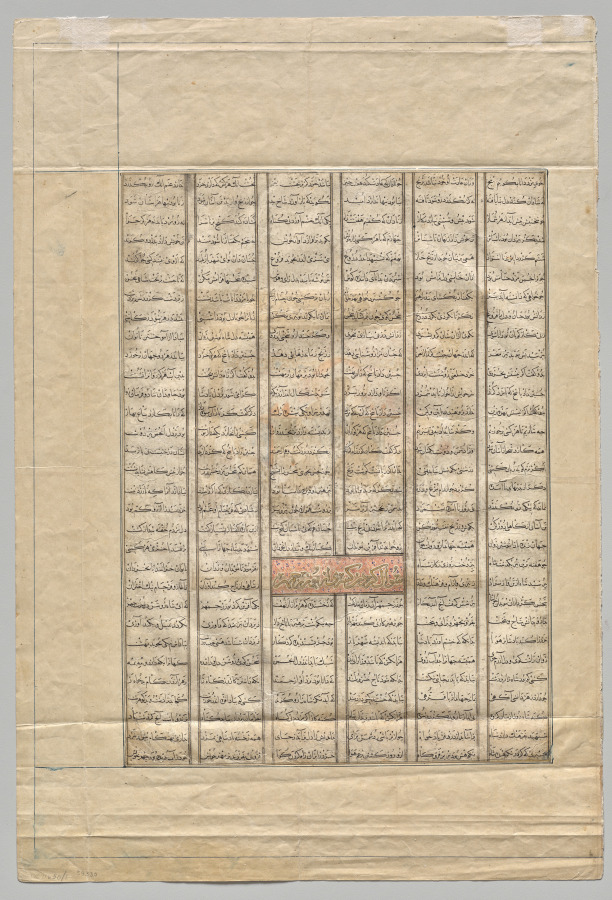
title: Persian Verses: The Fortieth Year of King Kisra Nushirwan's Reign and the Story of Buzurgmihr (recto) from a Shahnama (Book of Kings) of Firdausi (940–1019 or 1025)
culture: Iran, Tabriz, Ilkhanid period (1256-1353)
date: 1330–35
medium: Ink and opaque watercolor on paper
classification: Manuscript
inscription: Script: Naskh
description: Mongol interest in the production of illustrated manuscripts eventually focused on Persian epic poetry. The Shahnama, a compilation of the epics and tales of Iran's legendary heroes, was a natural choice; the book included many subjects that suited Mongol taste, such as banquets, battles, hunting, and magical or fantastic events. The painting on the other side of this page is of the Sasanian ruler of Iran, Khusraw I Anushirwan (531–579), descendant of Bahram Gur. Above the king's head an inscription reads, "Picture of Nushirwan the Just." The figure in the elaborate turban to the left of the king is probably the young Minister Buzurgmihr, famous for his wisdom and virtue. To celebrate the explanation of a troublesome dream by Buzurgmihr, Nushirwan held a series of seven banquets. The text around this painting describes the fifth banquet.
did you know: The Mongol rulers of Iran placed high value on illustrated manuscripts, especially histories, and established royal library-workshops.